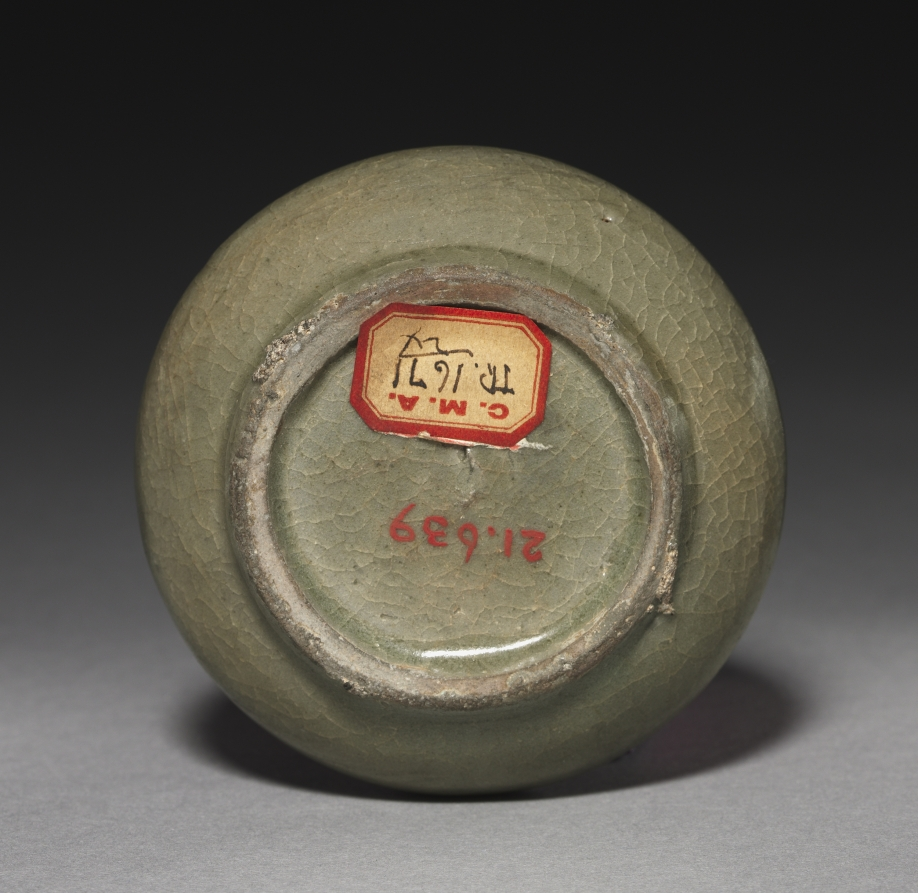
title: Oil Bottle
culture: Korea, Goryeo dynasty (918–1392)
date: 1100s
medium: pottery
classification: Ceramic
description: Celadons, spoons, seals, and bronze mirrors were the most common burial objects in tombs during the Goryeo period (918-1392). Once used to contain oil treatment for hair, this little celadon bottle was one of the standard goods that furnished elites' tombs.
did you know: This bottle was used to contain oil treatment for hair.